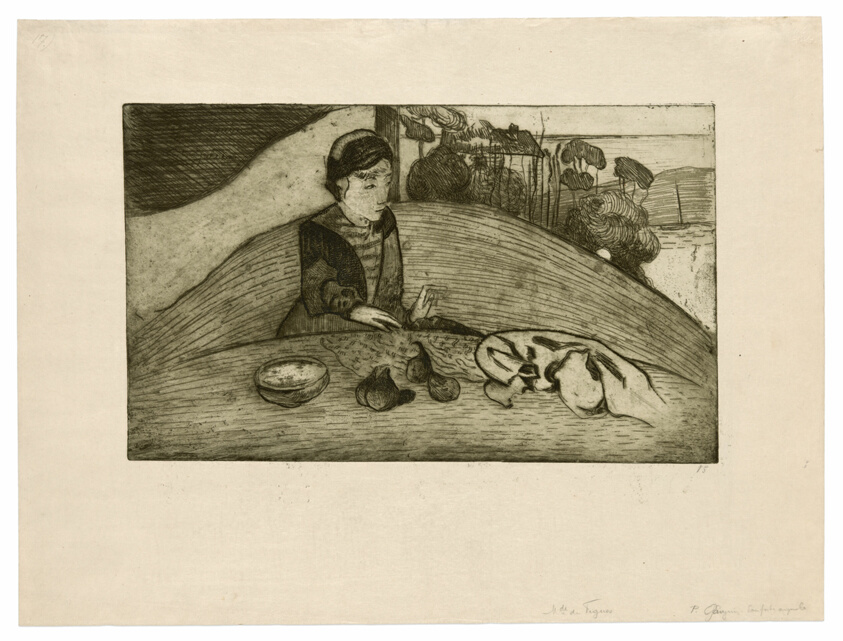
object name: Print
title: The Woman with Figs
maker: Paul Gauguin (French, 1848–1903)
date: 1894, printed 1899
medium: Etching with open bite applied with a reed pen on a zinc plate, in dark green ink with selective wiping, on cream wove Japanese paper (a proofing paper)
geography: France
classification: etching; print; prints and drawing